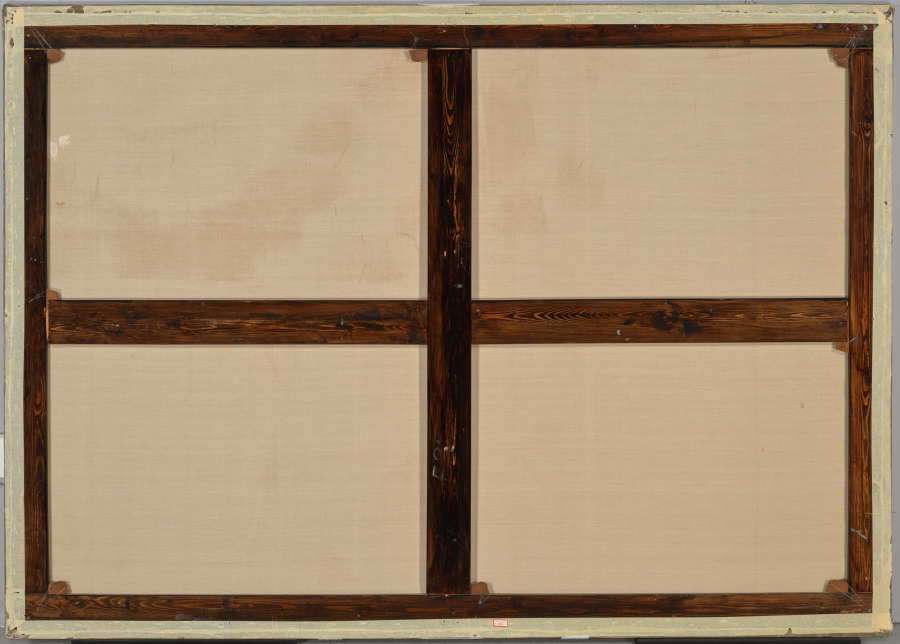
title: Danaë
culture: Italy, 17th century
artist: Orazio Gentileschi (Italian, 1563–1639)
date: c. 1623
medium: oil on canvas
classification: Painting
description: Danaë’s father feared a prophecy that his grandson would kill him, so he imprisoned his daughter to protect her from suitors. Yet Jupiter, king of the gods, fell in love with Danaë, and he came to her in the form of gold streaming from the sky. Gentileschi adopted Caravaggio’s method of painting directly from models, pulled to the front of the picture plane, which gives the painting a startling, tangible quality. However, the graceful way he handled paint and human gestures lends the work a poetic quality unique to the artist.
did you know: The gauzy scarf draped over Danaë was a studio prop present in many of Orazio's paintings.